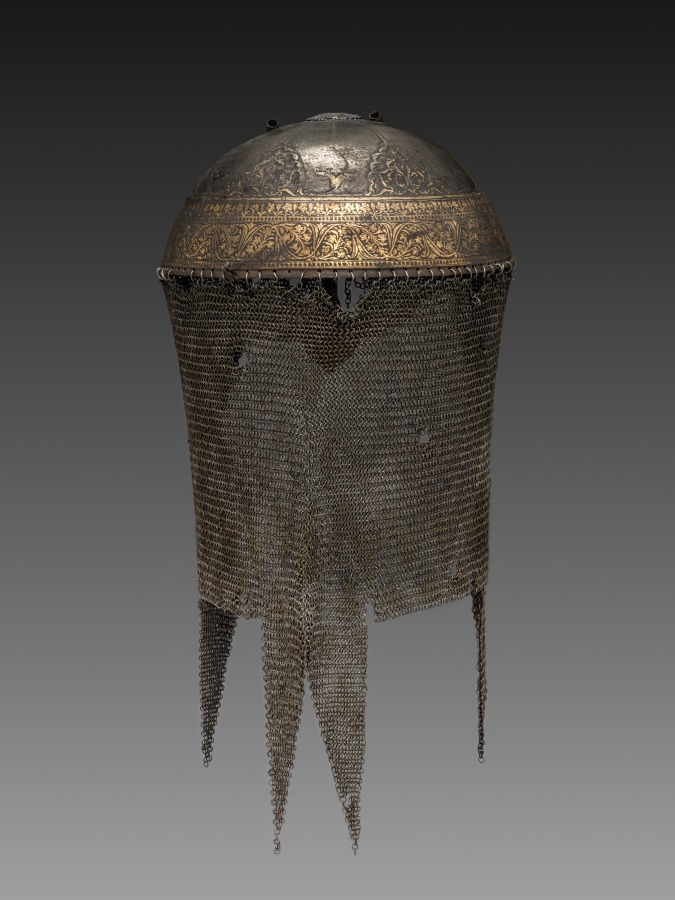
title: Helmet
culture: North India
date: 1600s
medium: steel with gold and brass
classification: Arms and Armor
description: Mughal soldiers wore hemispherical steel helmets to battle. This helmet’s surface features decorative floral patterns created using a process called damascening, in which gold wire was hammered into steel grooves. A leaf-shaped guard slides down in front of the nose for protection. The short tubes on either side of the nasal guard were for holding plumes, most popularly black heron feathers or white aigrettes. The spike that would have been on the apex has broken off. Also missing is the stuffed cotton padding that lined the interior. Chain mail made up of interlocking steel wire rings protected the ears, neck, and shoulders.